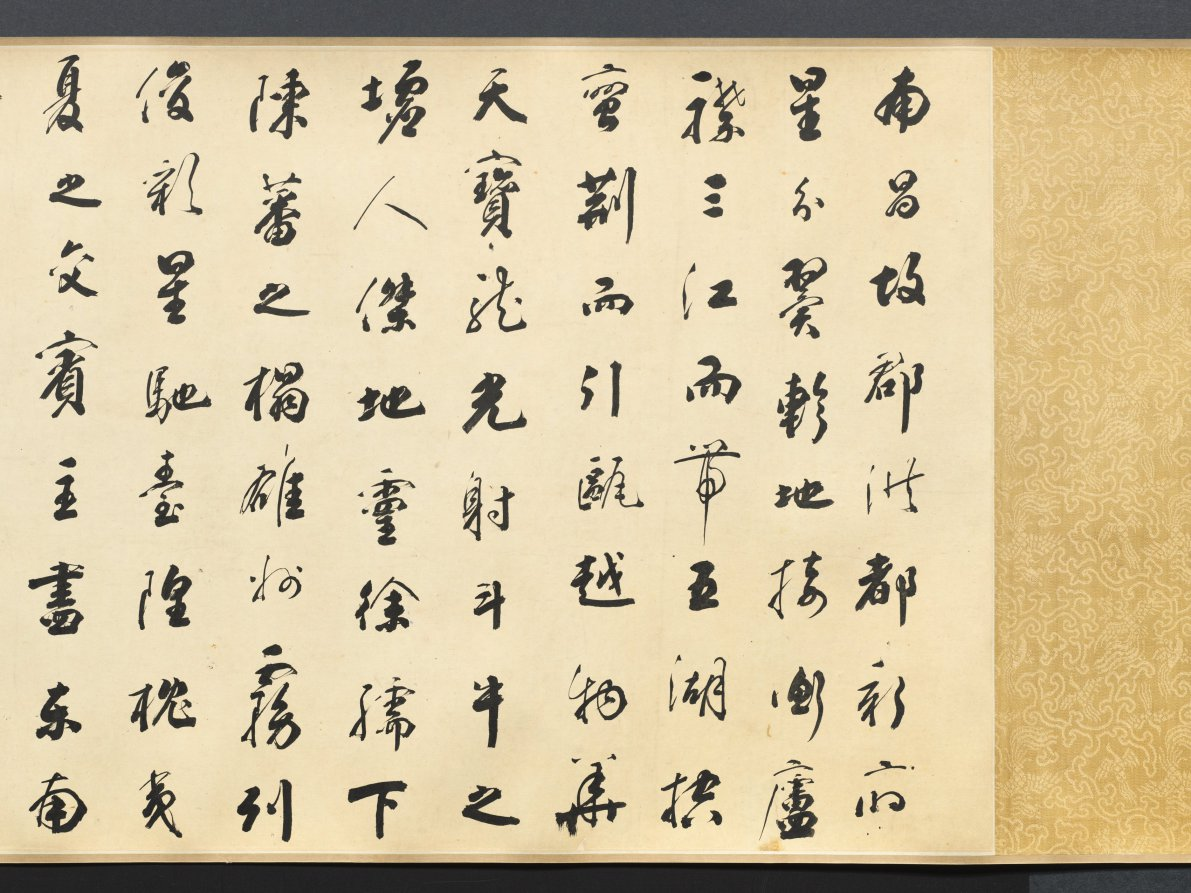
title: Calligraphy in Running Style based on Wang Bo's Essay on Tengwang Pavilion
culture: China, Changbai, Qing dynasty (1644-1911)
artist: Tiebao (Chinese, 1752–1824)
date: 1811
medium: handscroll, ink on paper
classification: Calligraphy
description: A member of the Donggo clan, Tiebao belonged to the Manchu Plain Yellow Banner army. As an official in the Qing court, he endured considerable vicissitude and his career was never smooth. Celebrated as a man of letters, he oversaw the publications of the Manchu military system as well as an anthology of poems by members of the imperial family and other Manchu dignitaries. In calligraphy, he was regarded as the equal of such eighteenth-century luminaries as Liu Yong (1720-1805) and Weng Fanggang (1733-1818). This handscroll is a work of his mature years and is exemplary of his disciplined and highly subtle approach to the art of calligraphy.